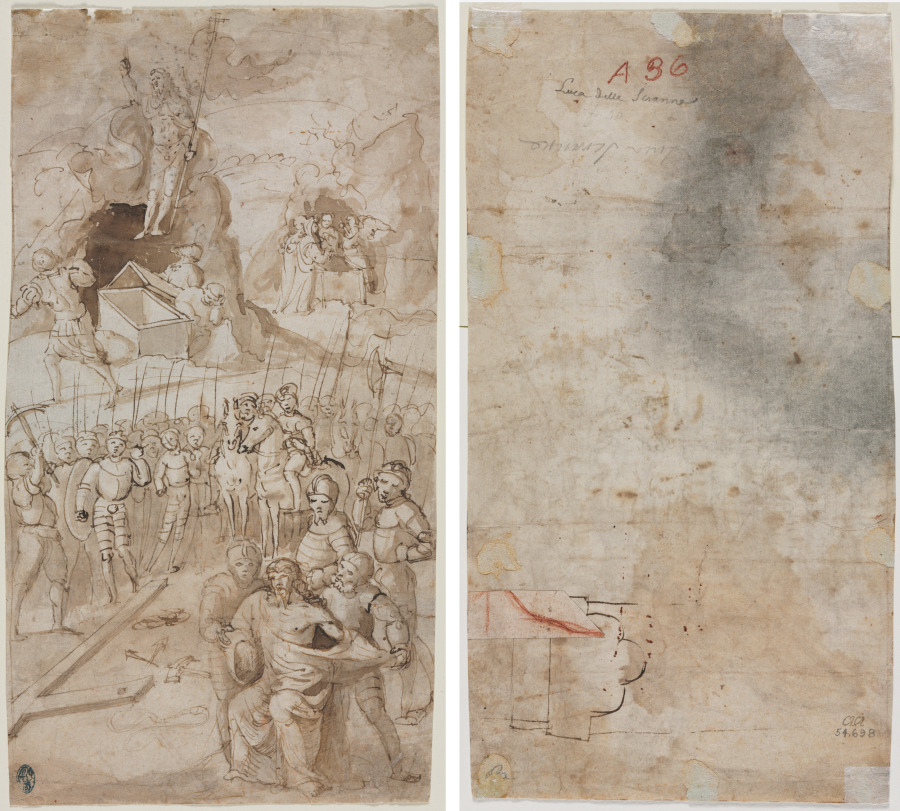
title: Three Scenes from the Passion of Christ (recto); Architectural Sketch (verso)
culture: Northern Italy, 16th century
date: 1500s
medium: pen and brown ink and brush and brown wash over traces of black chalk; framing line (left edge) in brown ink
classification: Drawing